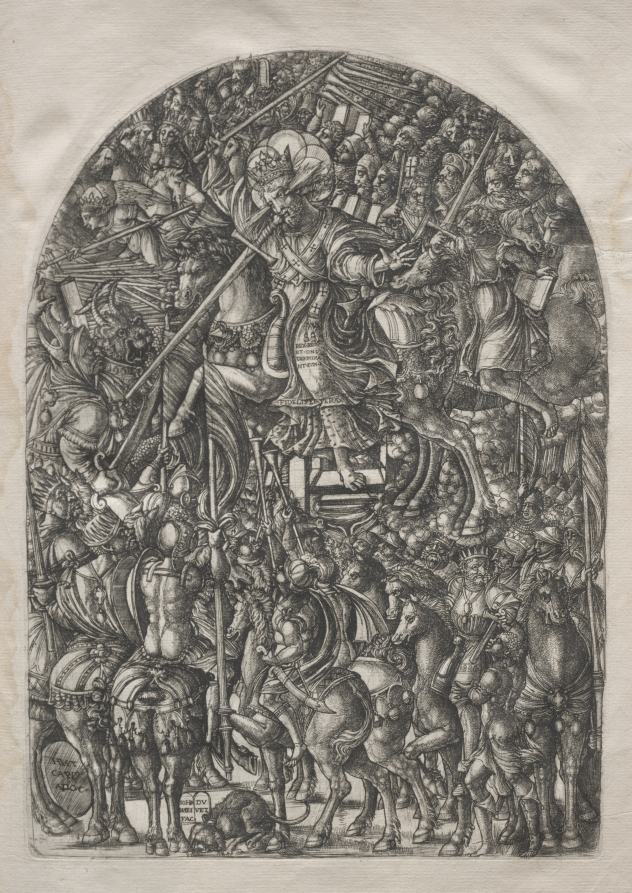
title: The Apocalypse: Christ Mounted on a White Horse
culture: France, 16th century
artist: Jean Duvet (French, 1485–1561)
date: 1546–1556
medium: engraving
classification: Print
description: This print is part of a bound volume of works illustrating the a narrative of the Apocalypse, taken from the Revelation of Saint John in the Bible. The 23 engravings in the series occupied the artist for a number of years and represent his greatest artistic achievement. The museum's volume is one of only seven known complete sets. Jean Duvet was one of the first major printmakers in France and one of the most original artists of the 1500s. Although he worked mostly in the provincial city of Langres, he became aware of Italian art through the circulation of prints—notably those of Marcantonio Raimondi. His solidly modeled human figures reflect the influence of the Italian High Renaissance. Duvet, however, developed an idiosyncratic, highly artificial style with crowded compositions that ignore rational space in favor of ornamental surface patterns.